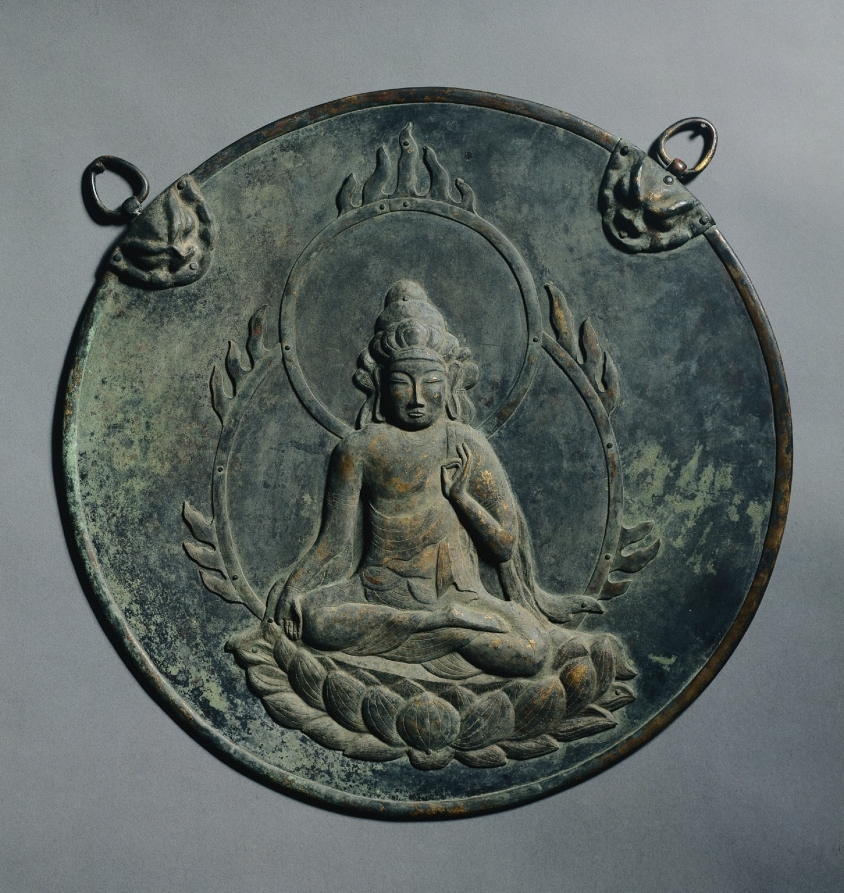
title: Votive Hanging with Image of Kannon (Kannon Kakebotoke)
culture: Japan, Nanbokuchō period (1336–92)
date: mid- to late 1300s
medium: Bronze with repoussé and etching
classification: Sculpture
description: Kakebotoke (literally “hanging Buddhist deities”) like this appeared from the latter part of the Heian period. They often hung on the doors of a Shinto shrine hall to indicate the Buddhist manifestation of the god, or kami, inside, or along the eaves of a Buddhist temple hall to indicate the Buddhist deity celebrated there.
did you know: Here the deity Kannon sits on a lotus flower, a symbol of purity and enlightenment.